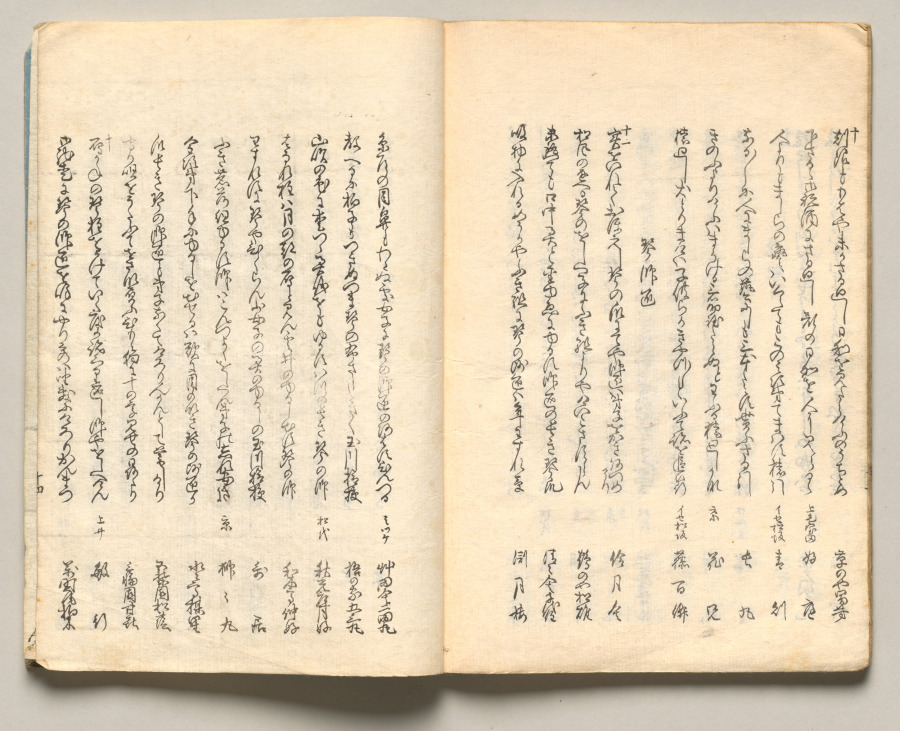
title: Spread Twenty-One from Volume Six of People of Japan in Light Verse (Kyōka)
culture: Japan, Edo period (1615–1868)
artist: Utagawa Hiroshige (Japanese, 1797–1858)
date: 1857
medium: Woodblock-printed book; ink and color on paper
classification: Bound Volume